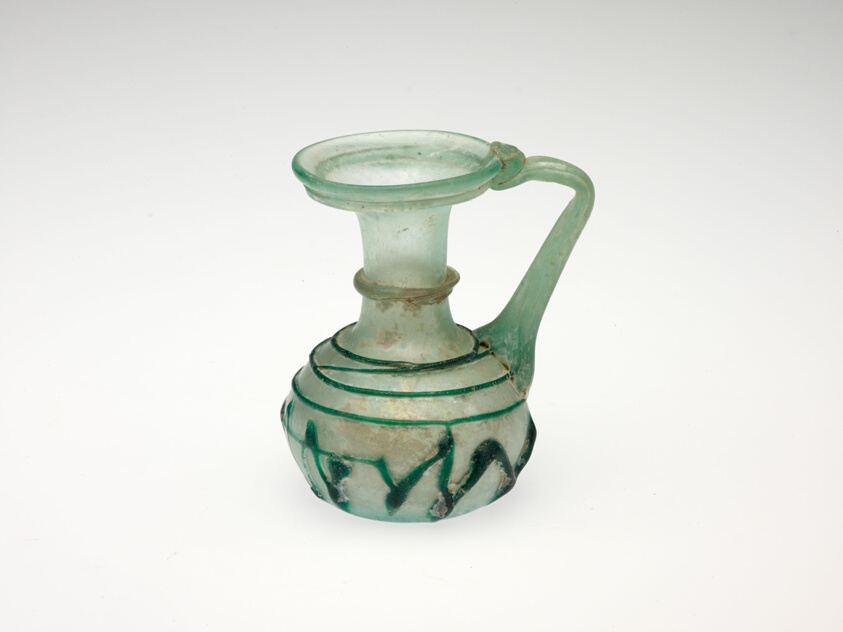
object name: Vessel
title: Jug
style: palestinian, syrian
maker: Late Roman or Byzantine; Eastern Mediterranean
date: 4th century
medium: Glass, blown technique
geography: Levant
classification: vessel; glass; ancient art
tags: vessels